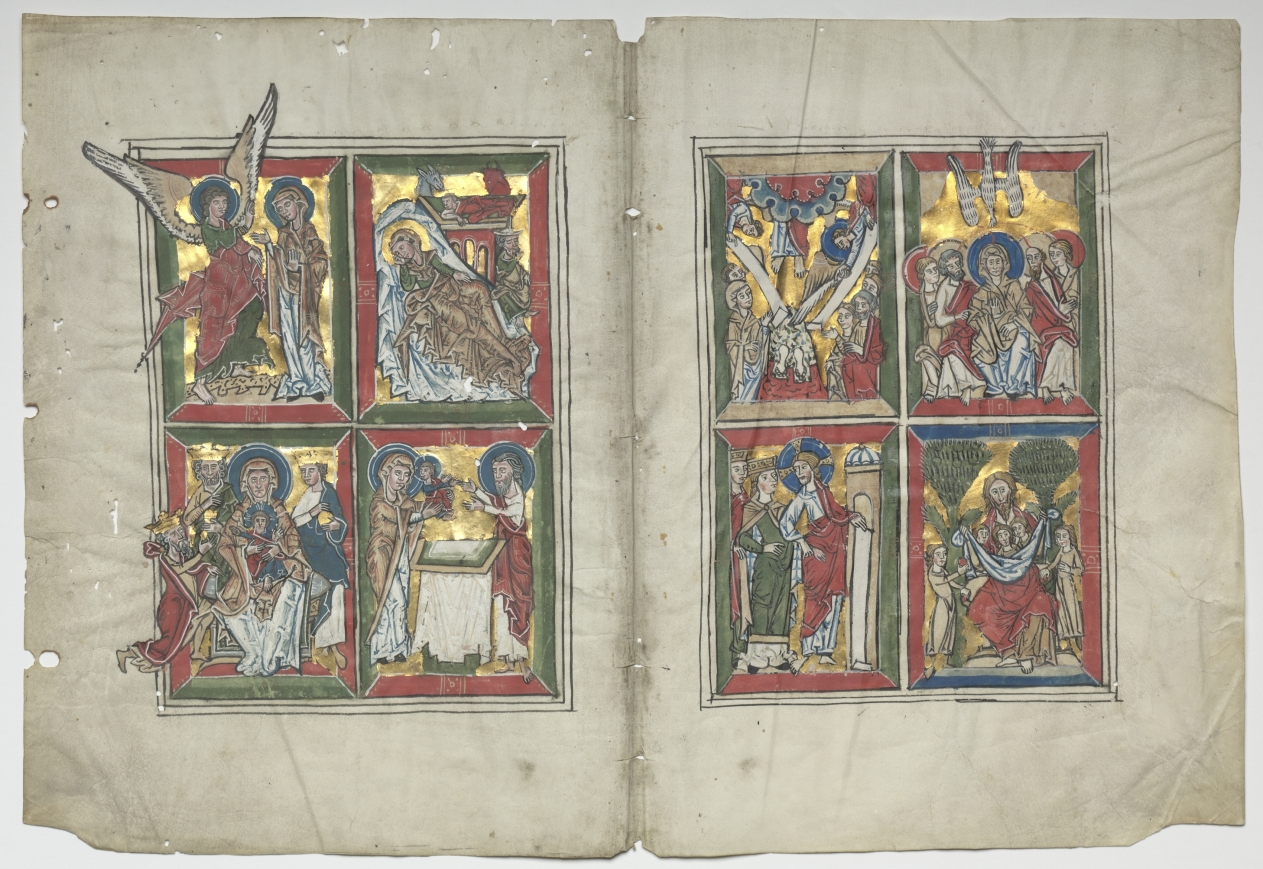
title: Bifolia with Scenes from the Life of Christ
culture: Germany, Lower Saxony (Diocese of Hildesheim), Braunschweig(?), 13th century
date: 1230–1240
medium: tempera, and gold on vellum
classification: Manuscript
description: A sheet of vellum (animal skin) folded down the center to create two leaves, or folios, is called a bifolium (plural: bifolia). This pair of bifolia originally were to have been inserted one inside the other, forming part of a large psalter, or book of the psalms. The small paintings, called miniatures, decorating each leaf are subdivided into four small panels and illustrate the life of Christ. This particular format, along with the style of decoration, tells us that the psalter was made in North Germany, in the Diocese of Hildesheim. In northern Europe, after 1050, a tradition emerged of illustrating psalters with scenes of the life of David (the author of the Psalms) and the life of Christ. This juxtaposition implied a shared ancestry, since Christ was a descendant of the House of David. In the parent volume these miniatures may have been accompanied by a David cycle.